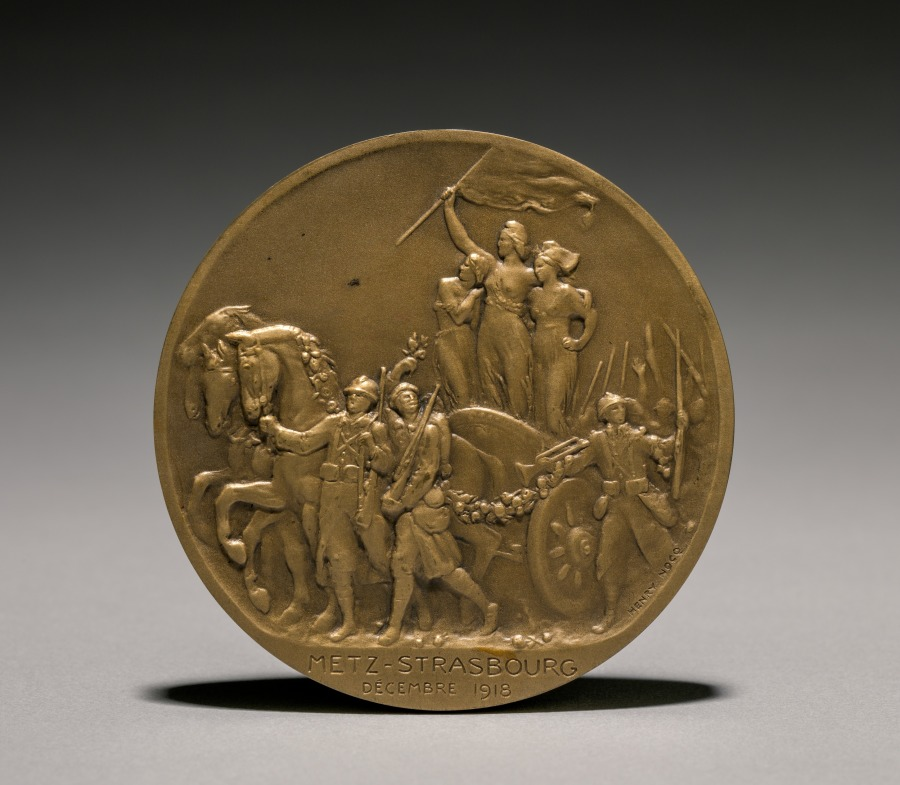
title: Poincare-Clemenceau Medal (reverse)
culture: France, 20th century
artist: Henri Nocq (French, 1868–1942)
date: 1900s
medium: bronze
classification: Metalwork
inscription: "Metz - Strassbourg, Decembre 1918."